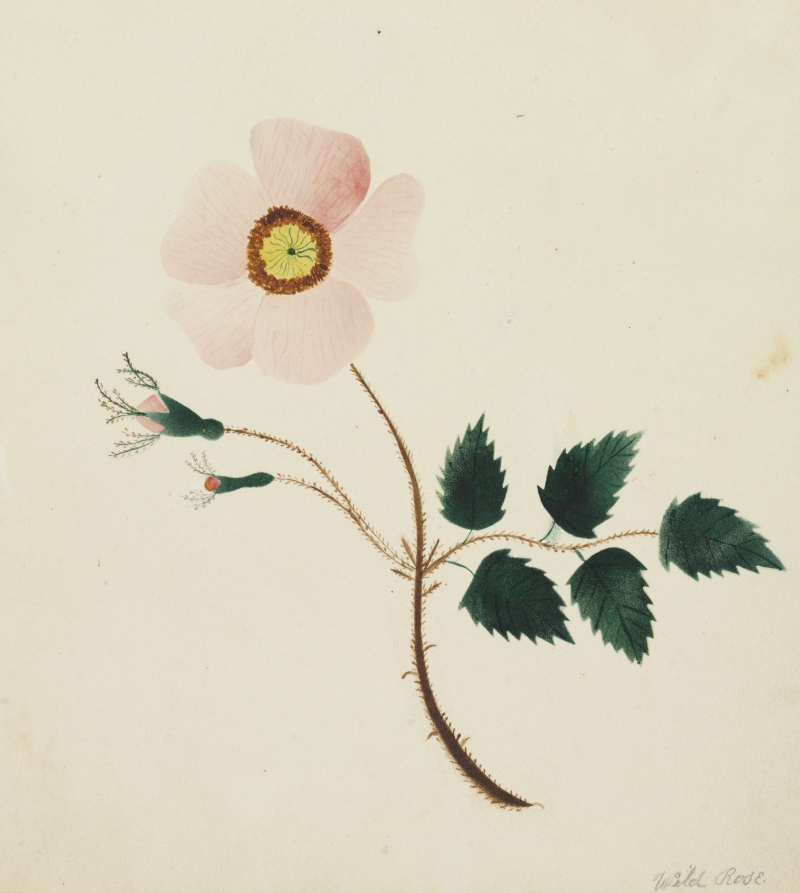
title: Wild Rose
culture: America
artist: Mary Altha Nims (American, 1817–1907)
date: 1800s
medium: watercolor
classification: Drawing